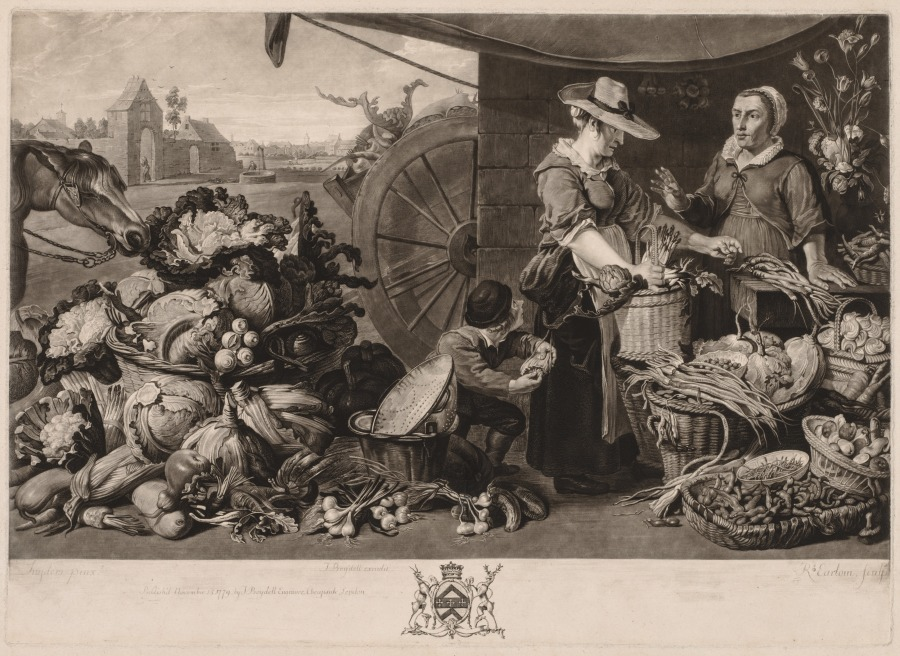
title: The Four Markets: The Vegetable Market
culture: England, 18th century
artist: Richard Earlom (British, 1743–1822)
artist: after Frans Snyders (Flemish, 1579–1657)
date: 1779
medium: mezzotint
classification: Print